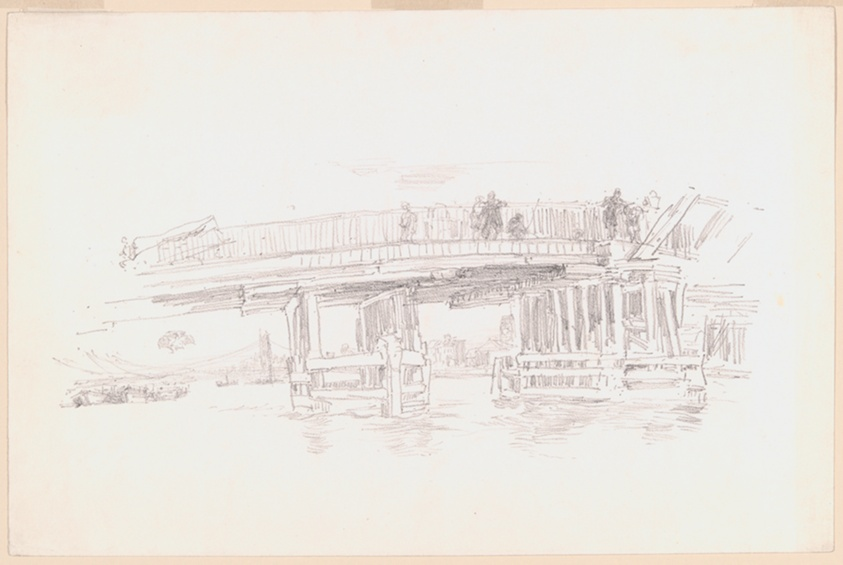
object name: Print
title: Old Battersea Bridge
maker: James McNeill Whistler (American, 1834-1903)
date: 1879, published 1887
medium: Lithograph, in black ink, with scraping, on white plate paper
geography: United States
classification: lithograph; print; prints and drawing; paper